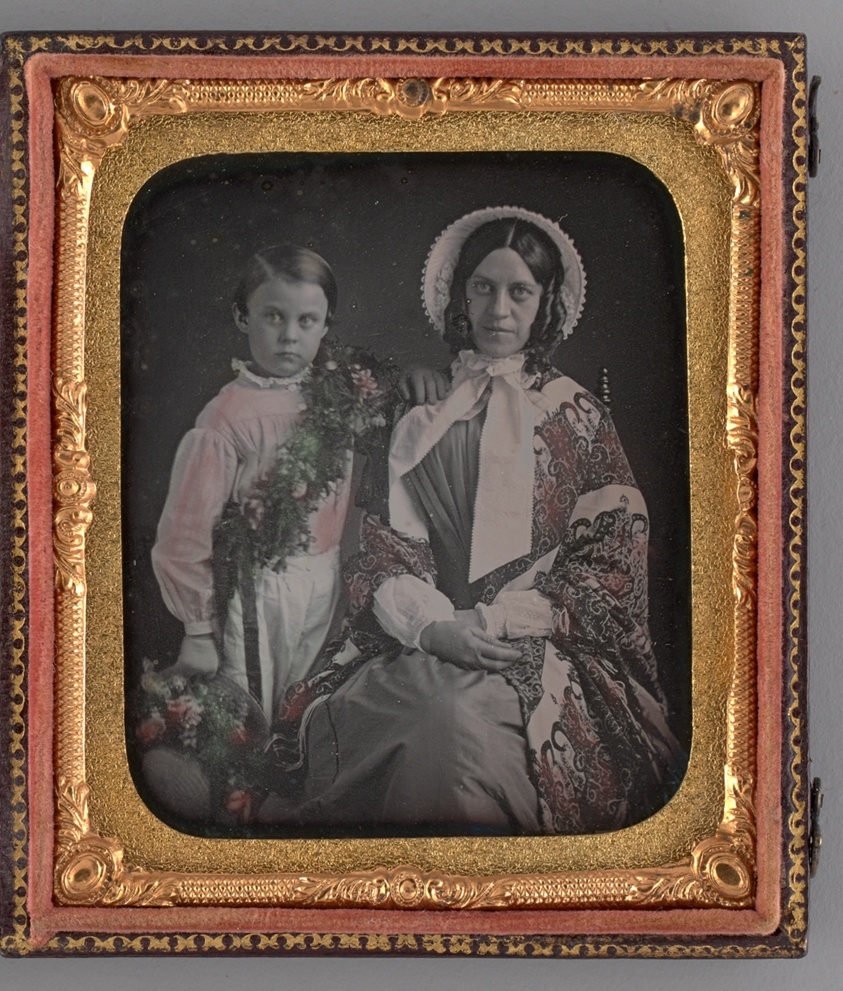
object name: Photograph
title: Untitled (Portrait of a Woman and a Boy)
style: 19th century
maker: Unknown maker; American, 19th century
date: 1855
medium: Daguerreotype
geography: United States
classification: portrait; photograph; photographic process; photography; portrait; daguerreotype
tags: lundberg collection, portrait, mother and child, mother, children, portraits, portraits: child subject, portraits: female subject